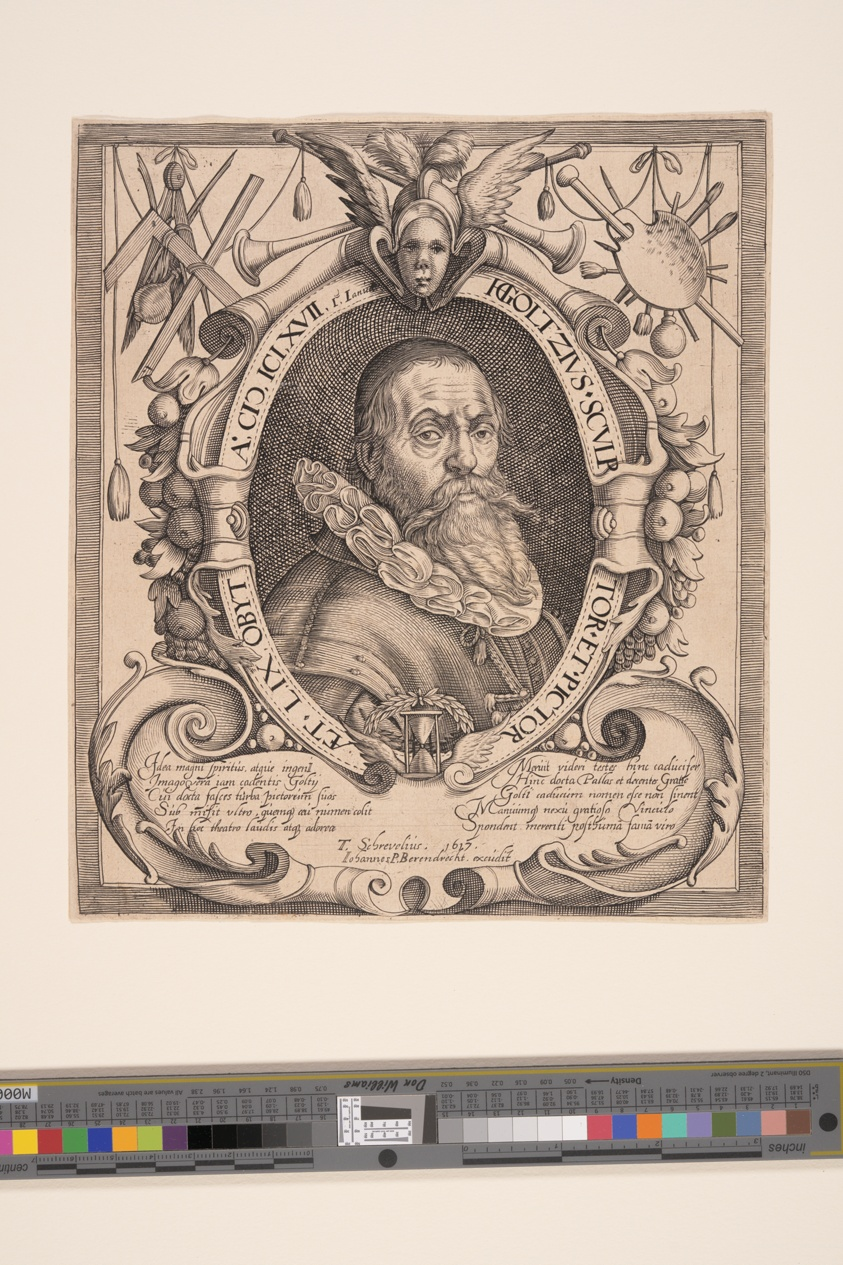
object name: Print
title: Hendrick Goltzius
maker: Unknown engraver; after Jacob Matham (Dutch, 1571-1631); published by Johannes Pietersz. Beerendrecht (Dutch, active 1614-1645)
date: 1617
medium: Engraving on laid paper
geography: Netherlands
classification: print; engraving; paper; prints and drawing